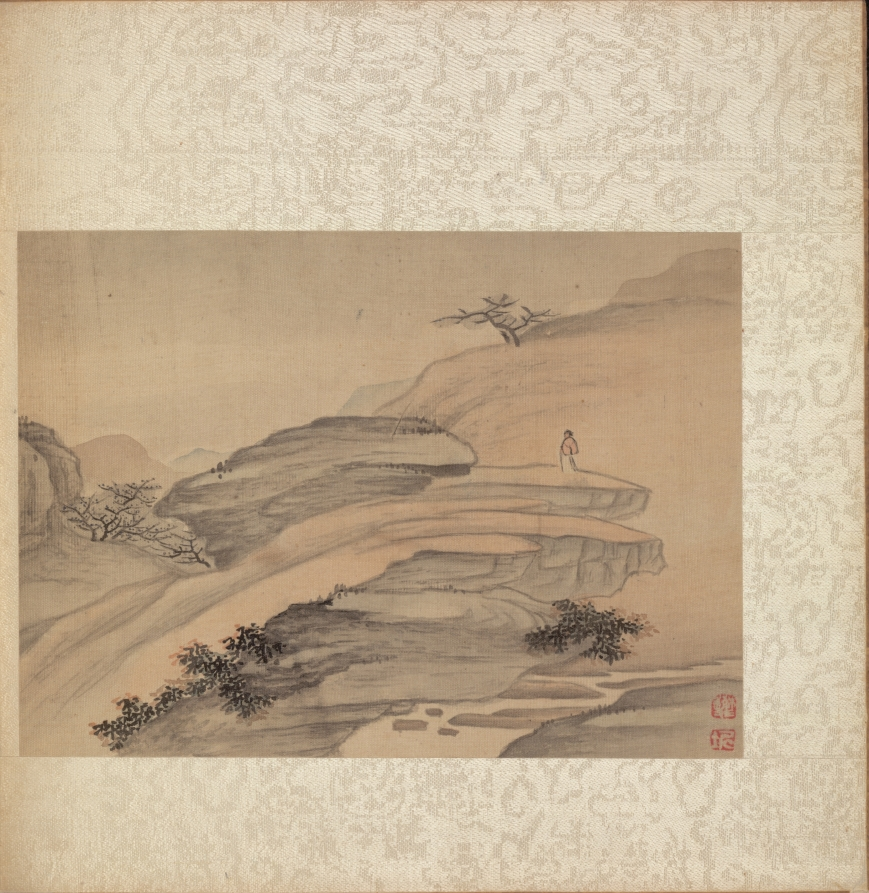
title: Album of Miscellaneous Subjects, Leaf 5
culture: China, Qing dynasty (1644-1911)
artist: Fan Qi (Chinese, 1616–after 1694)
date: early 1650s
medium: album leaf, ink and color on silk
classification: Painting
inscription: Artist seal: Fan Qi 樊圻. Poem by Zhou Yi 周儀 (mid 17th century–about 1705): That stone path surrounded by streams - for whom was it created?/ Leaning on my staff, I walk and hum, arriving alone./ As soon as I ascend to gaze at these mountains, my happiness increases,/ Every morning the moistening dew makes slippery the green moss.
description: Fan Qi's painting on the fifth leaf evokes Zuo Si's poetic line: I shake my robe atop the cliff of thousand ren. The calligraphy by Zhou Yi adjacent to the painting reads: That stone path surrounded by streams—for whom was it created? Leaning on my staff, I walk and hum, arriving alone. As soon as I ascend to gaze at these mountains, my happiness increases, Every morning the moistening dew makes the green moss slippery.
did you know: Barren tree branches on the peak and the bushes' reddish foliage give the scene an autumnal feel.